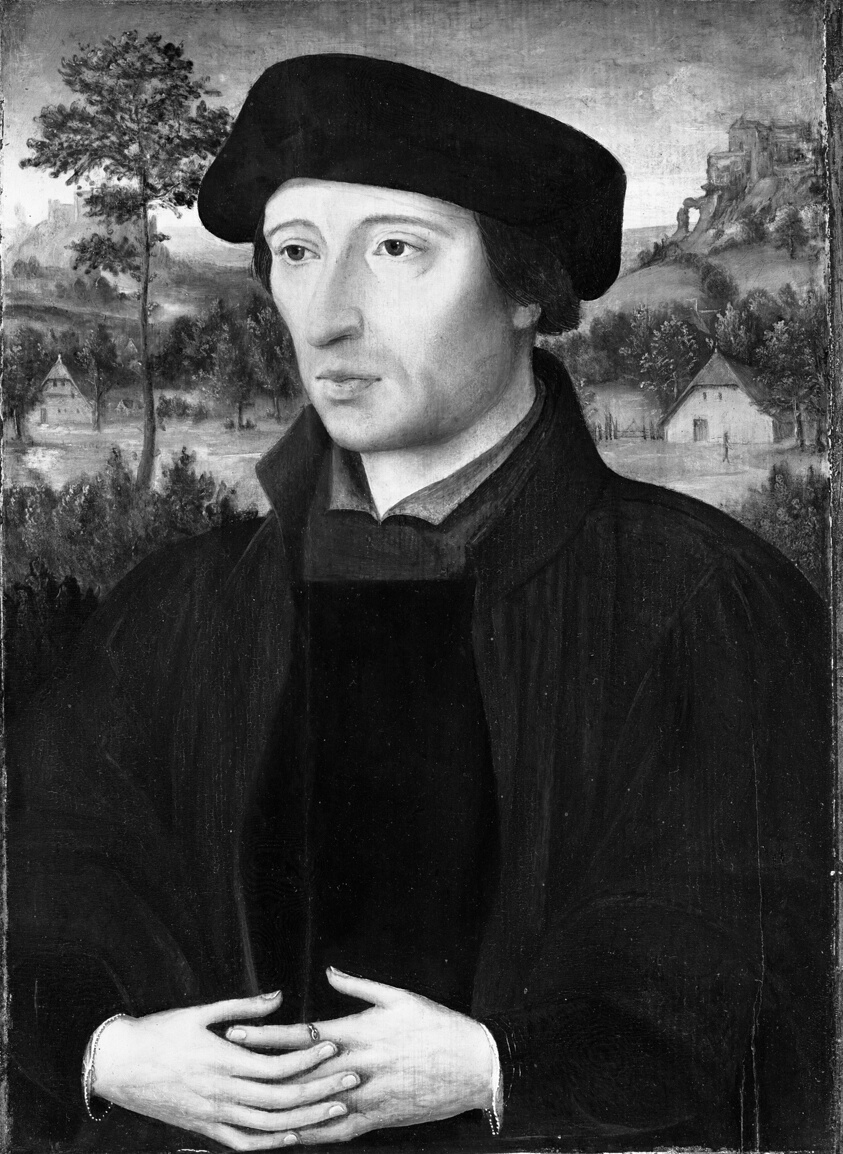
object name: Painting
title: Portrait of a Man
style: 16th Century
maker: North Netherlandish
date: c. 1525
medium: Oil on panel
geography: Netherlands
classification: painting; oil on panel; oil paintings (visual works); paint; portrait; european painting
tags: portrait, mountain, towns, landscape, hat, jewelry, man, portraits: male subject